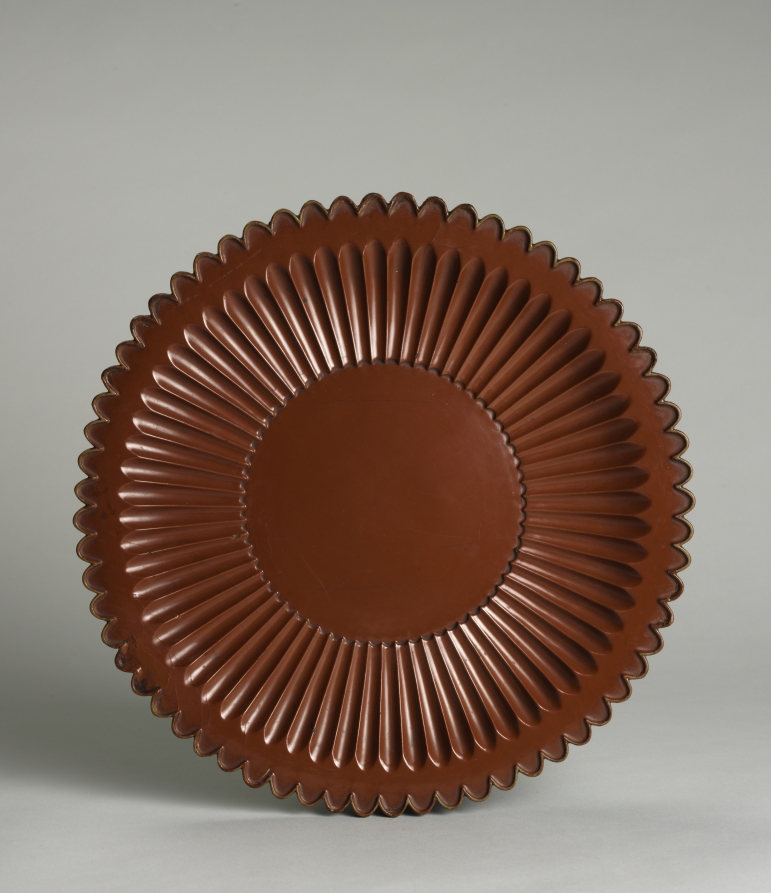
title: Fluted Tray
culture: China, Yuan dynasty (1271-1368) - Ming dynasty (1368-1644)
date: 1300s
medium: red lacquer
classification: Lacquer